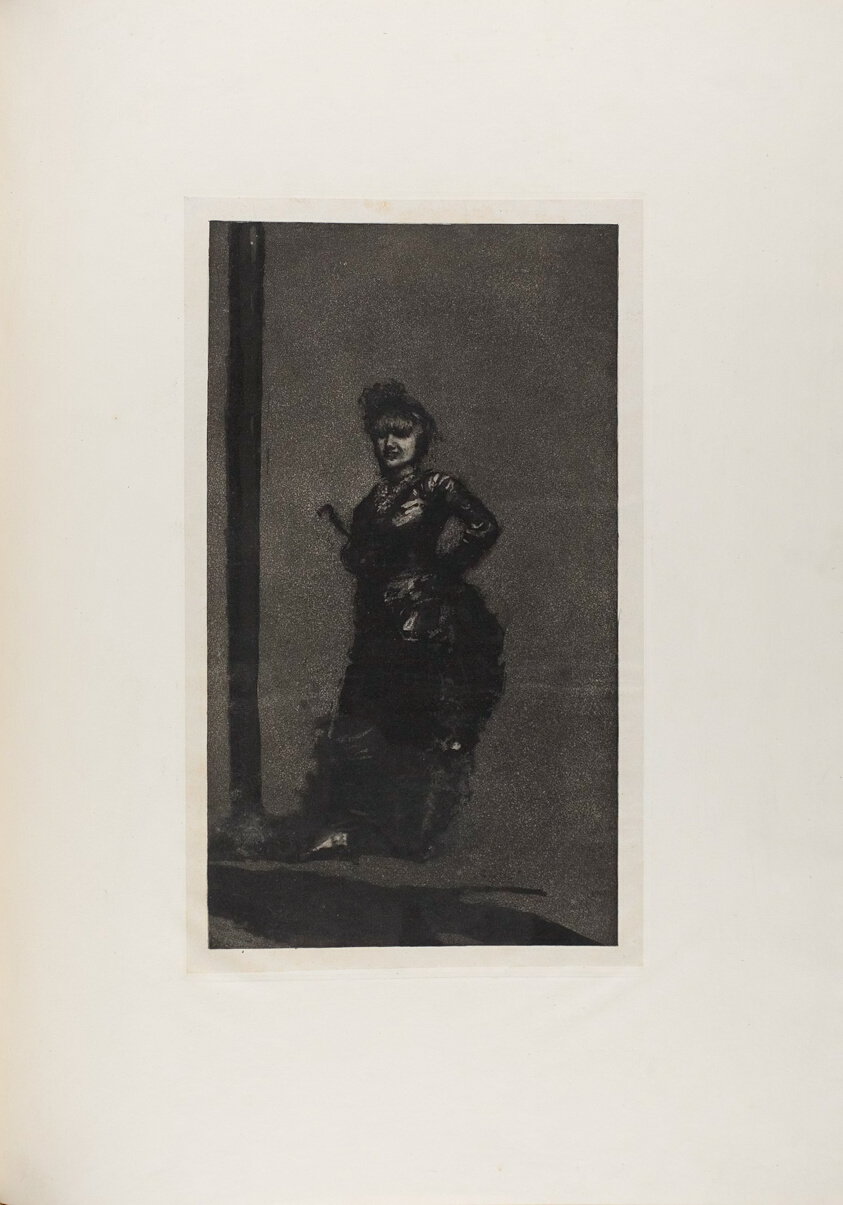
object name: Print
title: On the Street, from A Life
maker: Max Klinger (German, 1857-1920); printed by Otto Felsing (German, 19th century)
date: 1884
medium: Aquatint and etching, with drypoint on ivory China paper, laid down on cream laid paper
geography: Germany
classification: aquatint; print; prints and drawing